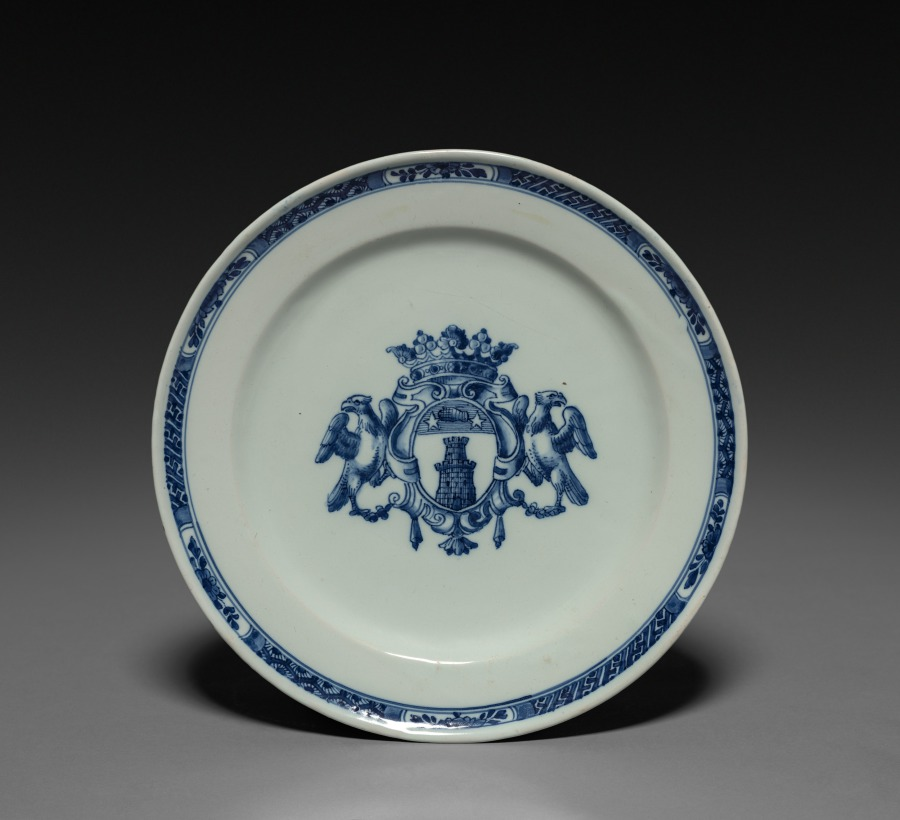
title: Plate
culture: France, Moustiers(?), late 18th century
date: late 1700s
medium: faience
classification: Ceramic